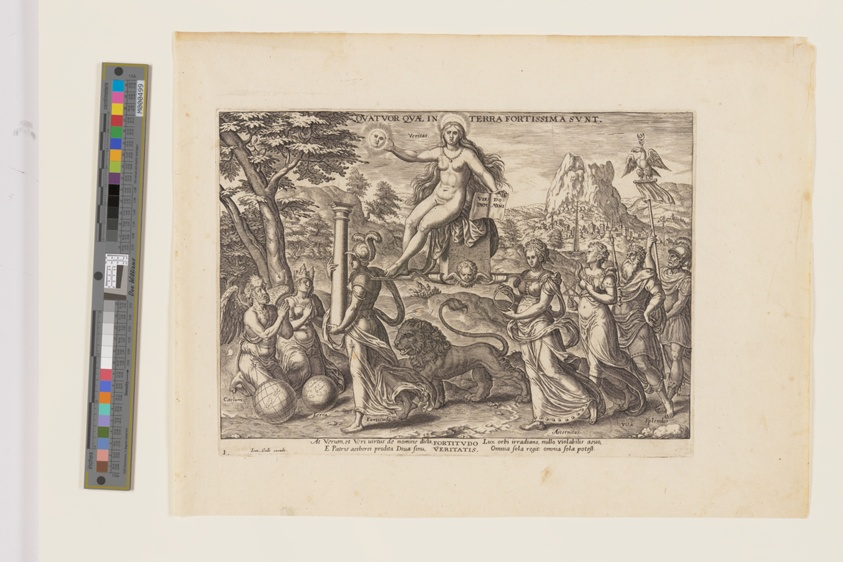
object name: Print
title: The Power of Truth [3 Esdras 4:36, 38], from The Four Strongest Powers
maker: Philips Galle (Flemish, 1537–1612); after Gerard van Groeningen (Netherlandish, active Antwerp, 1563-73)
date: 1574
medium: Engraving on ivory laid paper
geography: Flanders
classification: engraving; paper; print; prints and drawing